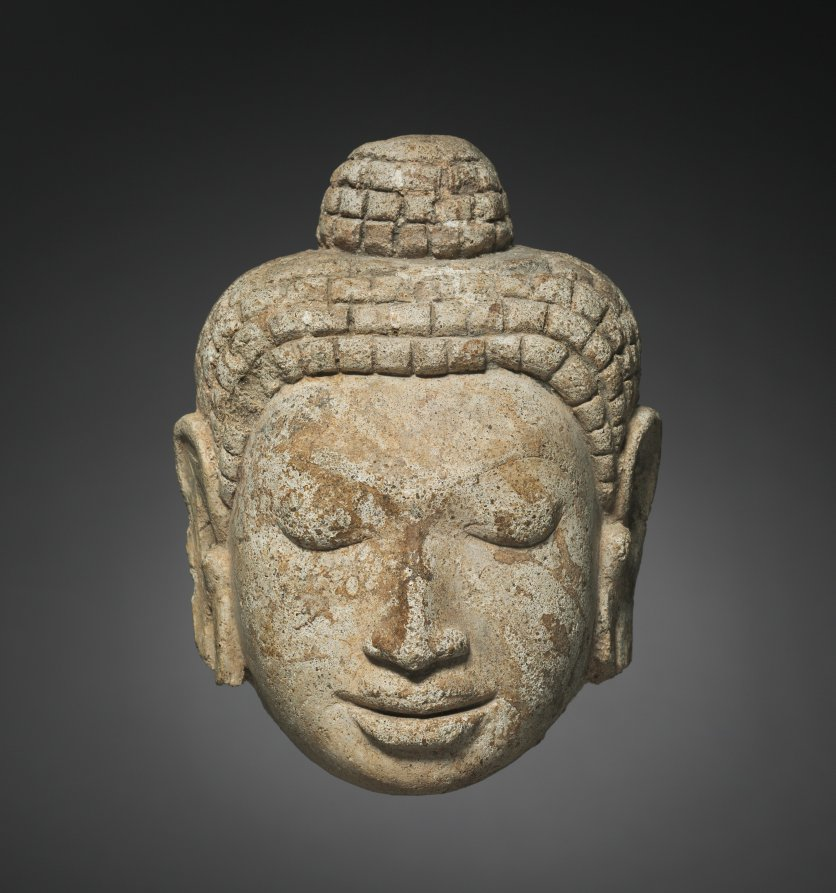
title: Head of Buddha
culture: Thailand, Mon-Dvaravati period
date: c. 600s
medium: stucco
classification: Sculpture